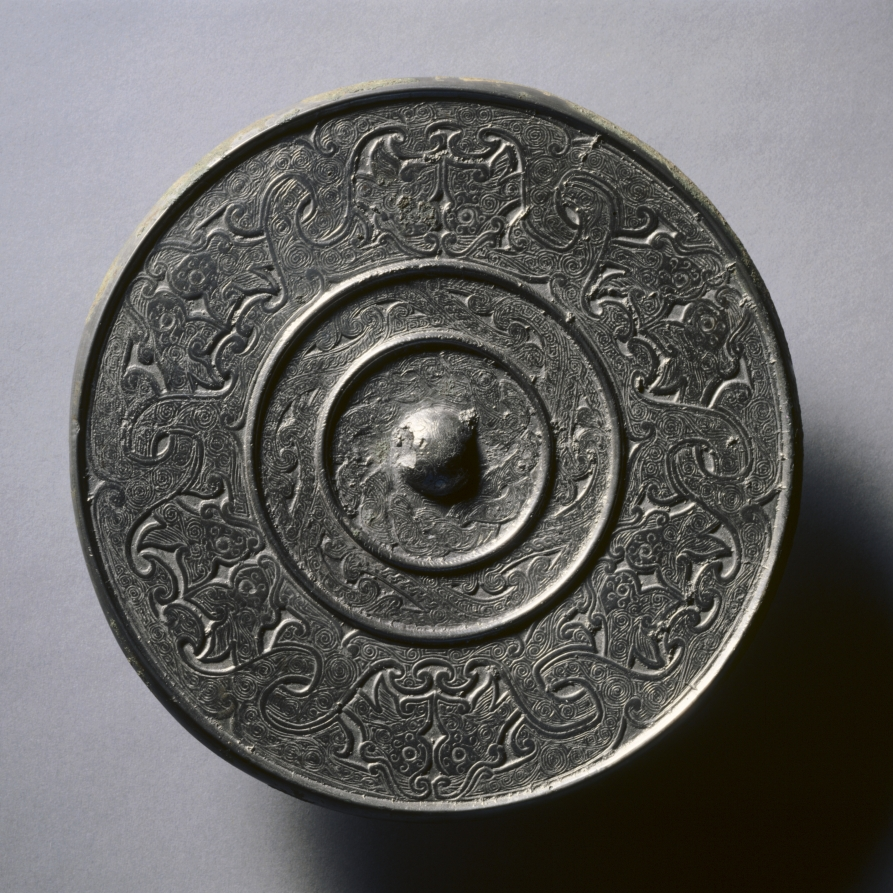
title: Mirror with Interlacing Dragons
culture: China, Tang dynasty (618-907)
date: early 600s-early 900s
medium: bronze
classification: Metalwork